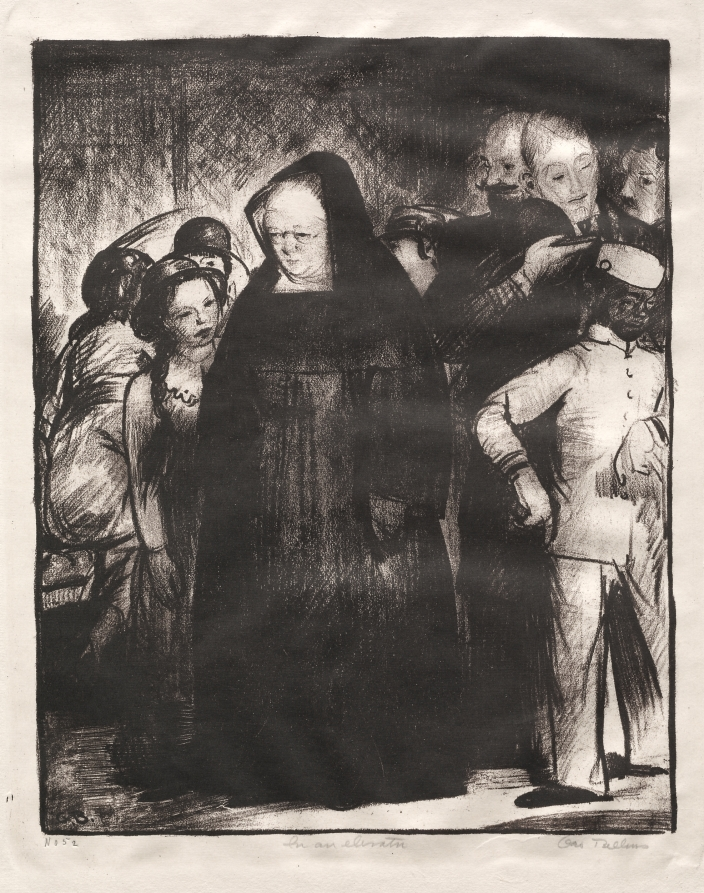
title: In an Elevator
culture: America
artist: George Bellows (American, 1882–1925)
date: 1916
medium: lithograph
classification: Print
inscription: In graphite, lower left, recto: "No 52"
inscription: In graphite, center, recto: "In an Elevator"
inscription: In graphite, lower right, recto: "Geo Bellows"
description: Elevators, in 1916 as today, often inspire awkward social interactions. George Bellows himself described this print as a “study of the relation of a nun to society.” The Old World European values and modesty of the nun contrast to the younger, more boisterous passengers, who give wide berth to her dominating physical and moral presence.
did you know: The young African American man in this image is the elevator operator, responsible for manually operating the lift.